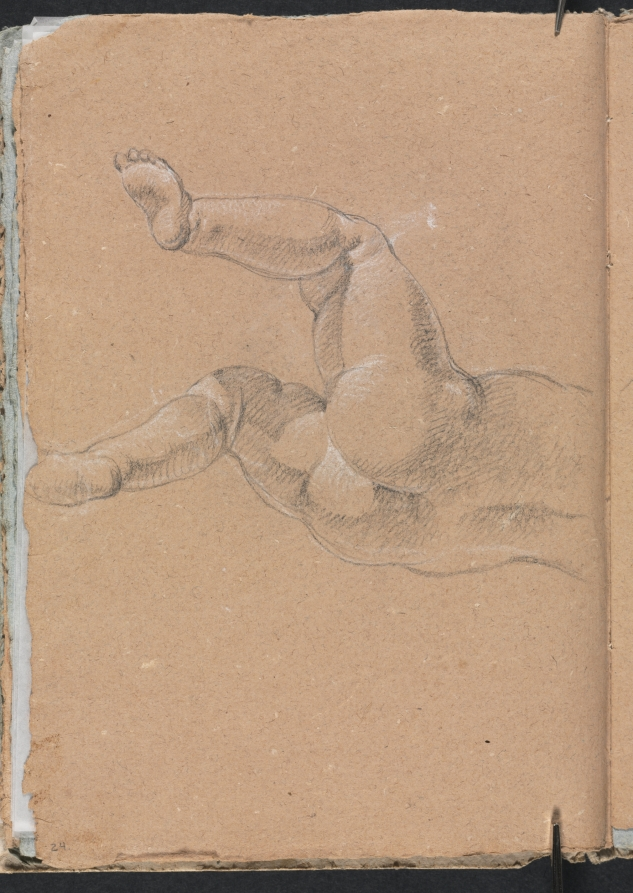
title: Verona Sketchbook: Putto (lower half of body) (page 24)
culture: Italy, 18th century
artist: Francesco Lorenzi (Italian, 1723–1787)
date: 1760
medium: black chalk with white heightening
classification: Bound Volume